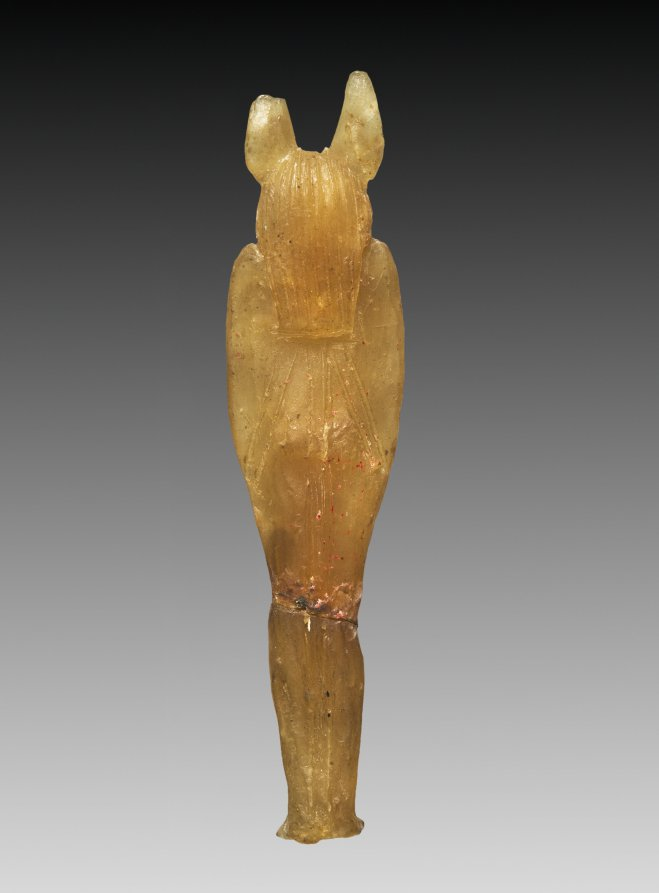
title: Son of Horus: Duamutef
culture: Egypt, Third Intermediate (1069–715 BCE), Dynasties 21–22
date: 1000–900 BCE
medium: honey-colored wax with dark amber varnish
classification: Funerary Equipment